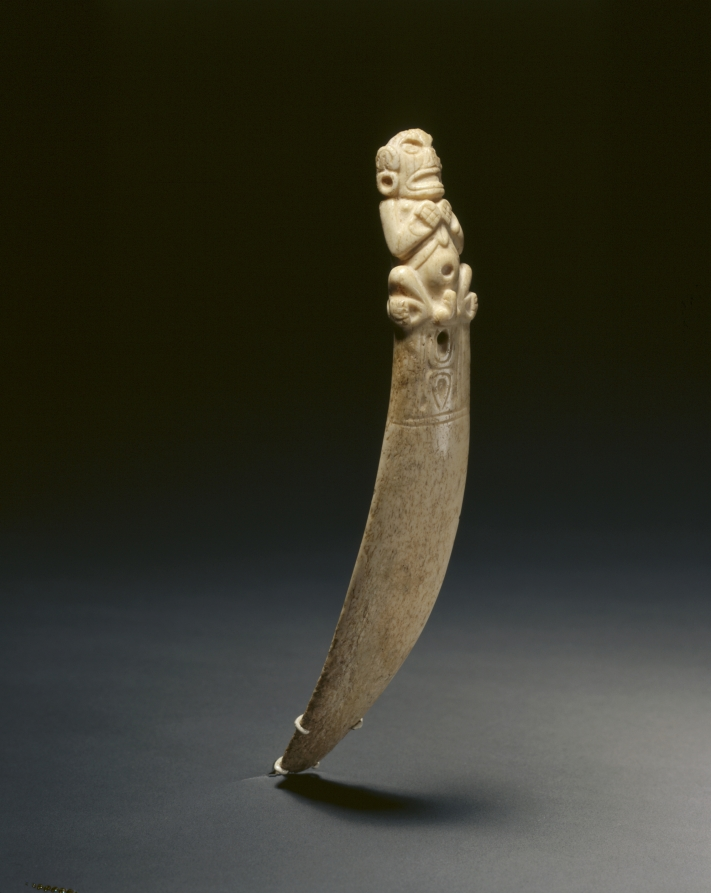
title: Spatula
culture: Caribbean, Greater Antilles, Taino, 10th-15th century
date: 900–1492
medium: manatee bone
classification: Sculpture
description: In 1492, when Christopher Columbus sailed into the Caribbean, the islands of Cuba, Hispaniola (Haiti and the Dominican Republic), Jamaica and Puerto Rico were inhabited by the Taino people. Taino religious ceremonies often included the snuffing of hallucinogenic herbs to alter the consciousness and facilitate contact with the spirit world. Carved spatulas were used to blend the powdered herbs. After purifying the body through purging the stomach, the snuff was inhaled into both nostrils.